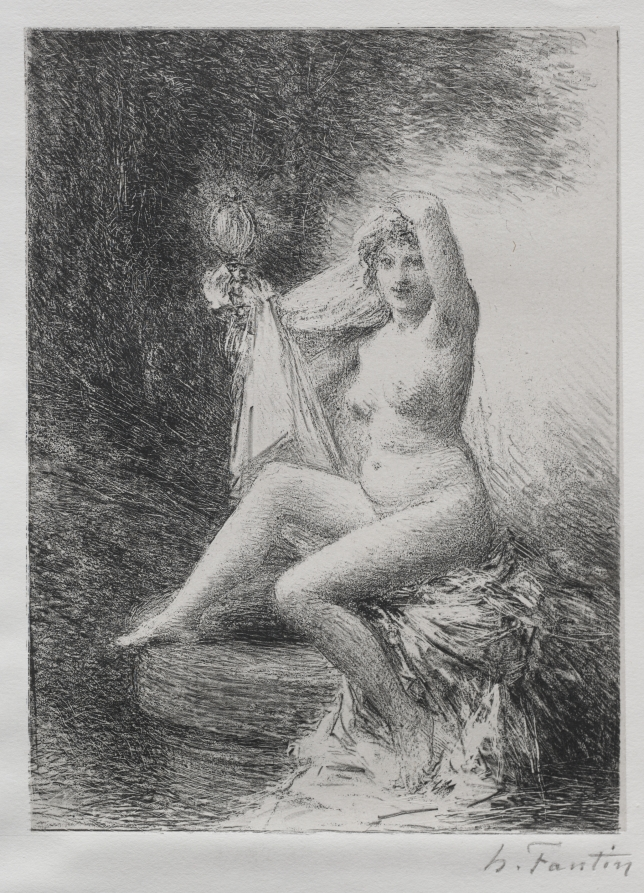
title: La verité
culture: France, early 20th Century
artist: Henri Fantin-Latour (French, 1836–1904)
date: 1900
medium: lithograph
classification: Print